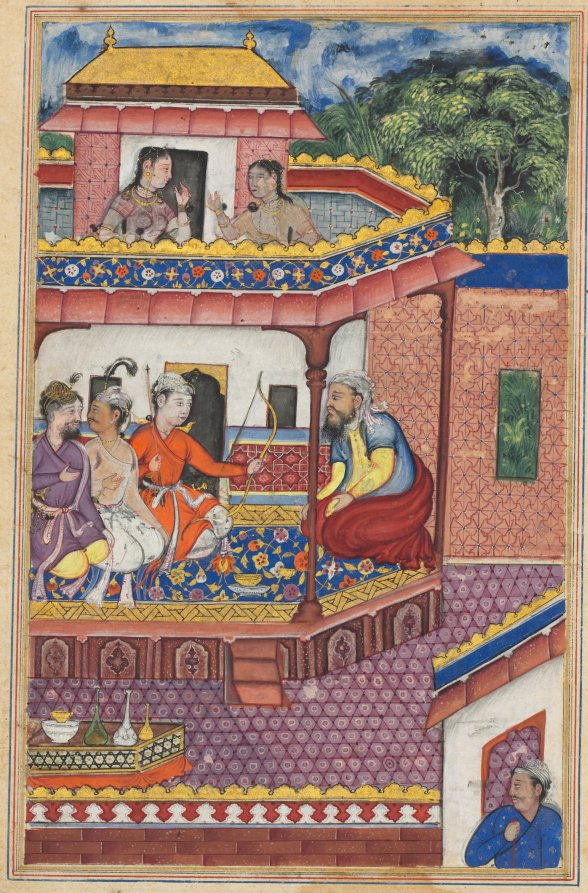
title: The three young men present themselves as suitors for the hand of Zuhra, the daughter of the merchant of Kabul, from a Tuti-nama (Tales of a Parrot): Thirty-fourth Night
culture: Mughal India, court of Akbar (reigned 1556–1605)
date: c. 1560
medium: gum tempera, ink, and gold on paper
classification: Painting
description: Above, two women listen as three suitors address the merchant of Kabul. Each hopes to prove himself worthy of marrying the merchant’s daughter, Zuhra. The first is skilled in divination; the second can bring carved wooden horses to life, and the third is a talented archer. Before Zuhra can select a husband, she is kidnapped by an evil fairy.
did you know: Zuhra is also the name of the planet Venus.